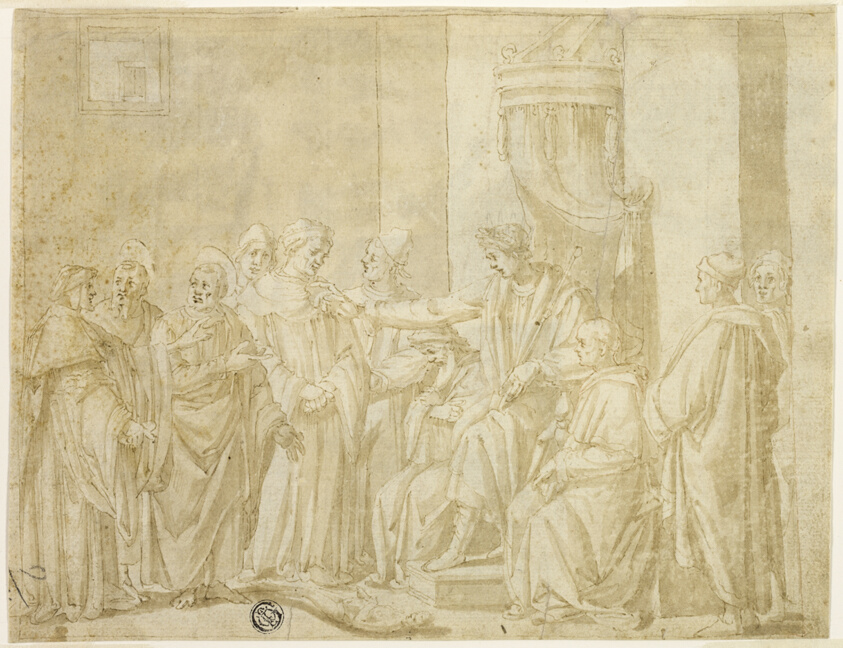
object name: Drawing and Watercolor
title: Saints Peter and Paul Disputing with Simon Magus before Nero (recto); Five Scenes from the Story of Moses (verso)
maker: Andrea Boscoli (Italian, c. 1560-1608)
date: c. 1580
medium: Pen and brown ink with brush and brown wash, over traces of black chalk (recto), and pen and brown ink with brush and brown wash (verso), on ivory laid paper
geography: Italy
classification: pen and ink drawings; drawings (visual works); prints and drawing